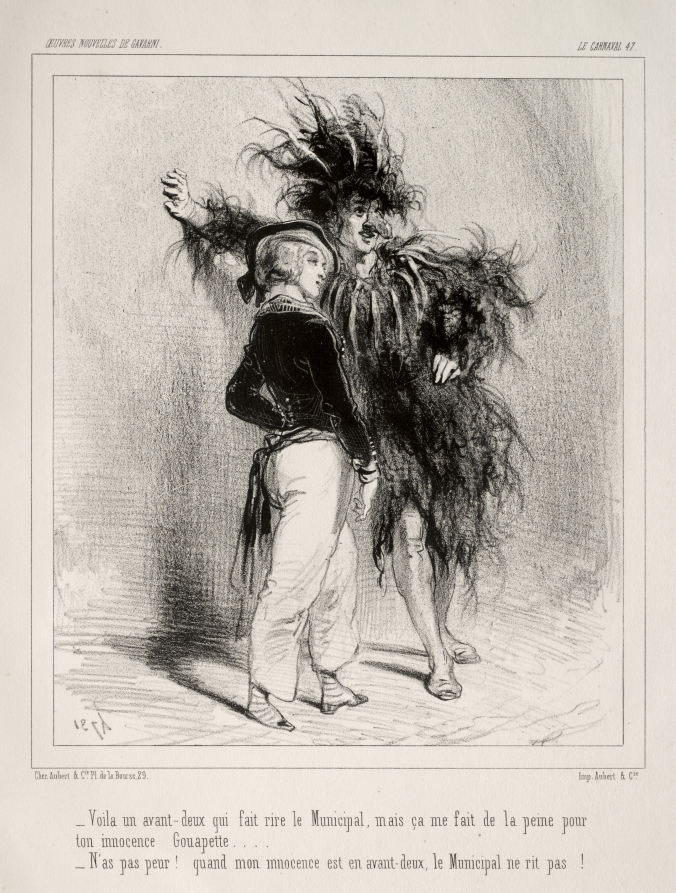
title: Carnaval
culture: France, 19th century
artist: Paul Gavarni (French, 1804–1866)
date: c. 1841–47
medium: lithograph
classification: Print